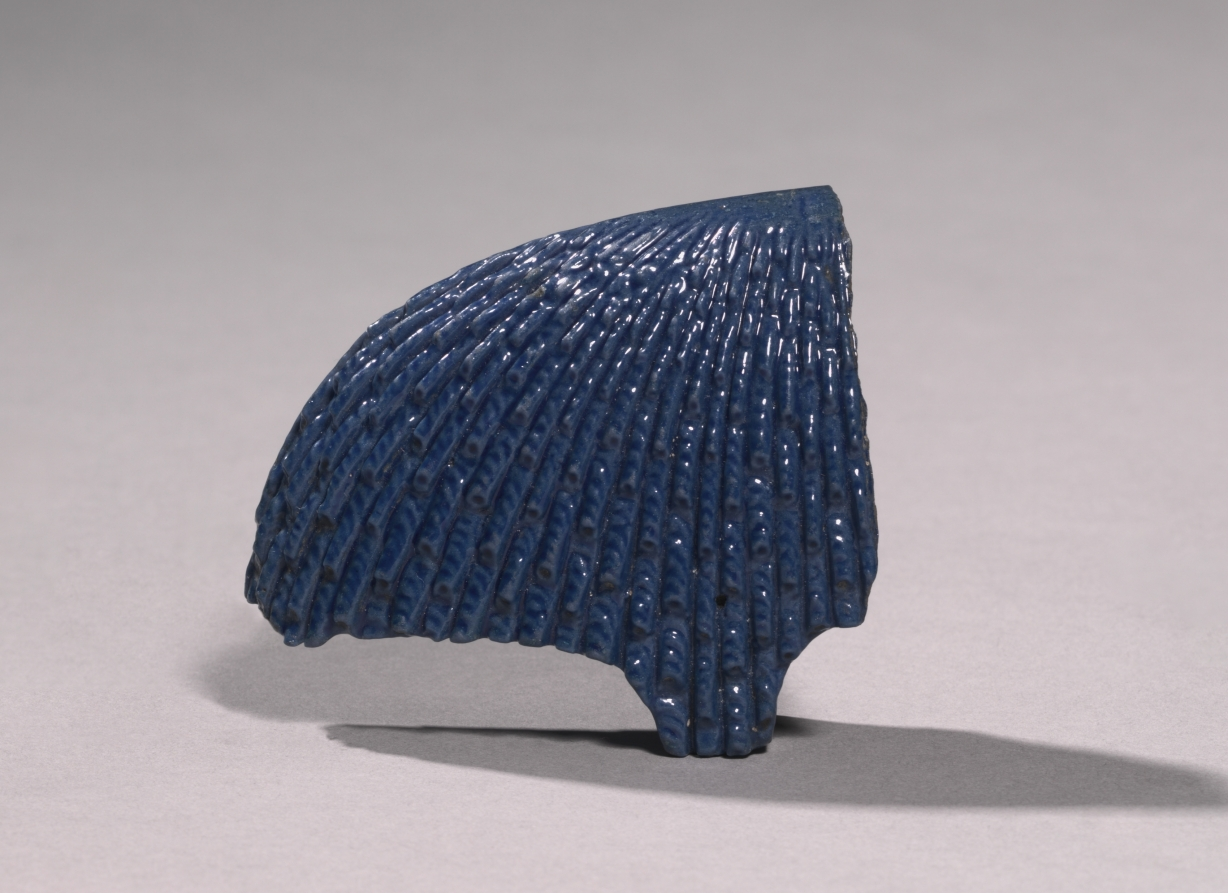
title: Fragment of an Inlay Headdress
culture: Egypt, New Kingdom (1540–1069 BCE), Dynasty 18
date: c. 1353–1295 BCE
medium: lavender blue faience with deep blue overglaze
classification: Inlays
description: This fragment is part of the curled headdress of an inlay figure, probably of a queen, assembled of various materials fit together like the pieces of a jigsaw puzzle. The front part of the headdress (directly over the forehead) is to the left, followed by the ear tab and part of the cutout above the ear. The luster of the faience is marvelously preserved. Blue, primarily associated with lapis lazuli, was an appropriate color for kings' and gods' hair and was part of the apparatus signaling them as otherworldly beings.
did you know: It has been suggested that this fragment was part of a headdress that belonged to a queen. The fine, carved details of this headdress attest to the great skill of its maker and the luster of the blue lapis lazuli faience would have been appropriate for Egyptian royalty.